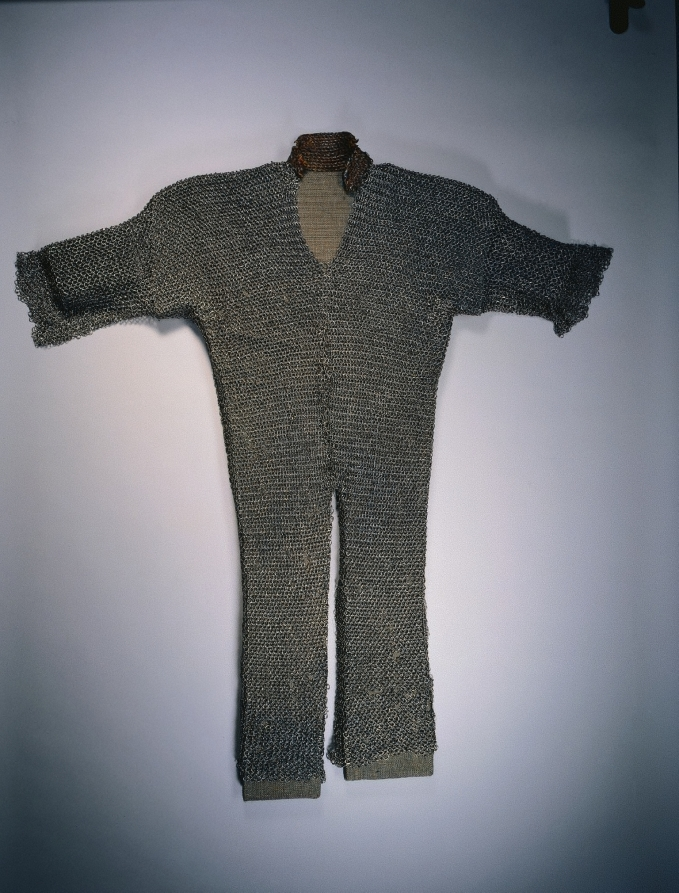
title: Hauberk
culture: European, 15th century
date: 1400s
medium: fine steel rings; leather collar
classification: Arms and Armor